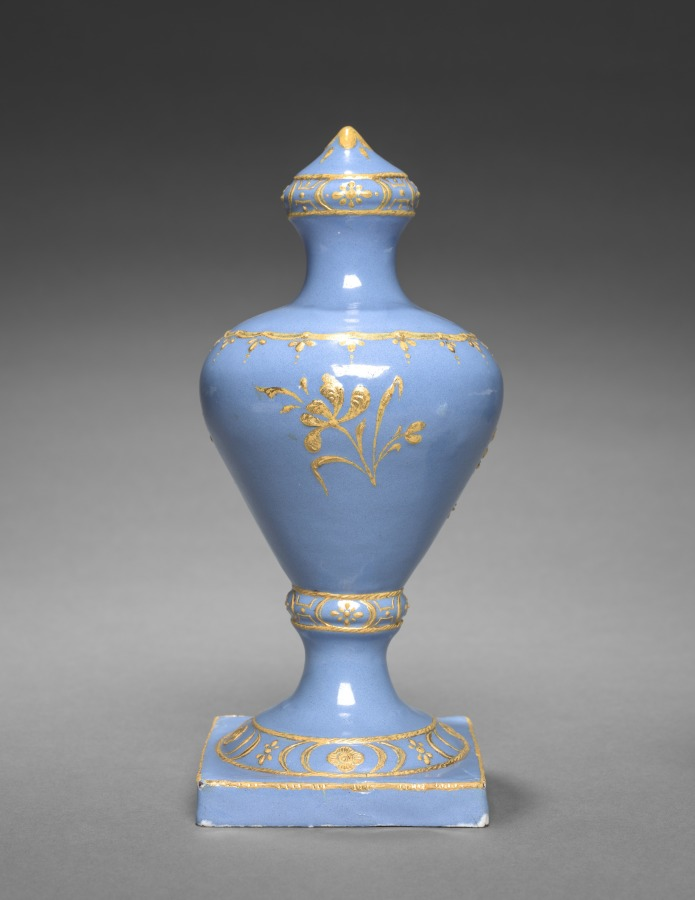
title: Urn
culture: England, South Staffordshire, 18th century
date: c. 1770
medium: enamel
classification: Enamel